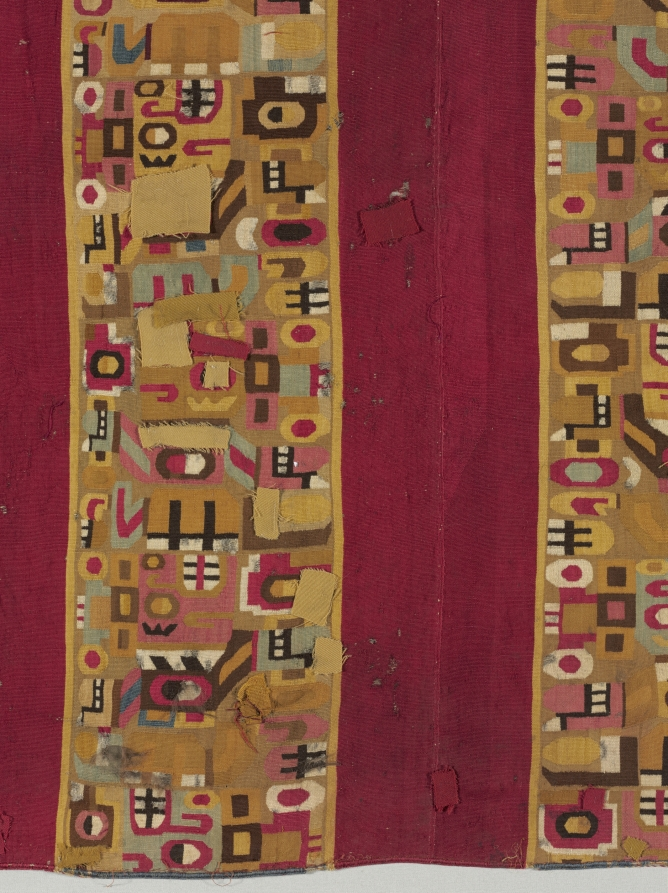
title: Tunic with Sacrificer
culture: South America, Peru, Central Andes, Middle Horizon, Wari people, 7th-11th century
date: 600–1000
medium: camelid-fiber, cotton; tapestry weave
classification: Textile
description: An extremely abstract supernatural sacrifice repeats in different colors and orientations across the body of this tunic, which was shortened on one side in antiquity. Look for the toothy black-and-white mouth in the sacrificer's upward-gazing head; other facial features include a button nose and a vertically divided eye. The figure holds the L-shaped haft of an axe behind its back and, at the front of its body, a short staff with a severed, upside-down human head on the top.